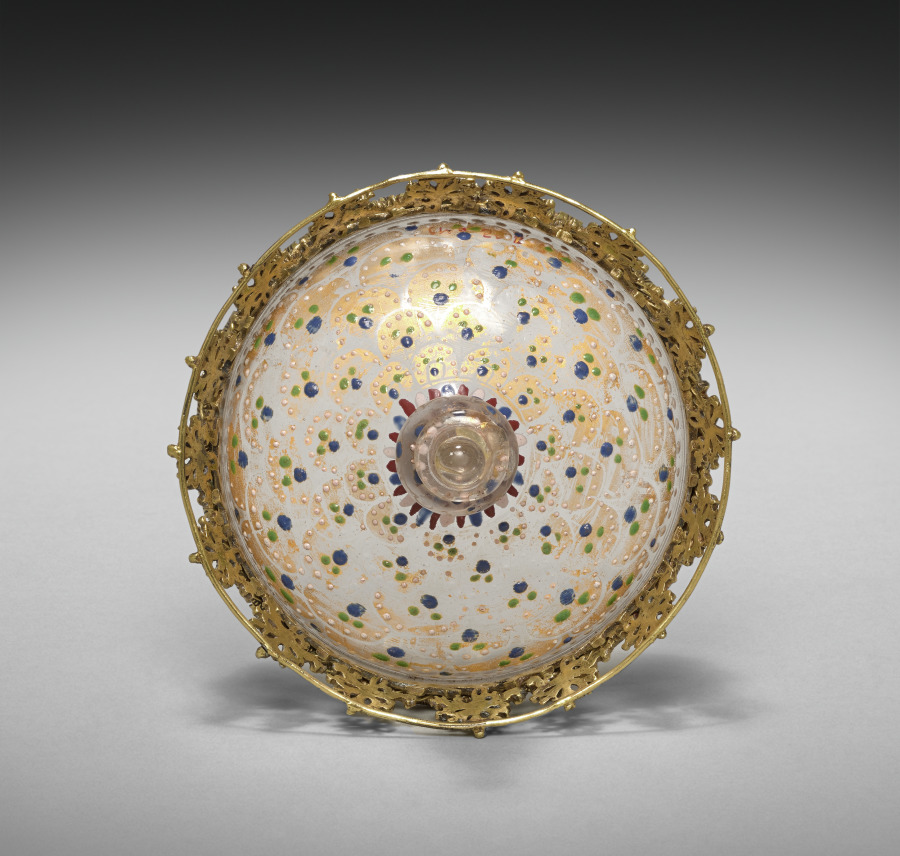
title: Cover for a Beaker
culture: Italy, Venice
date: c. 1490–1500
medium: glass, enameled and gilded, gilt-silver mounts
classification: Glass